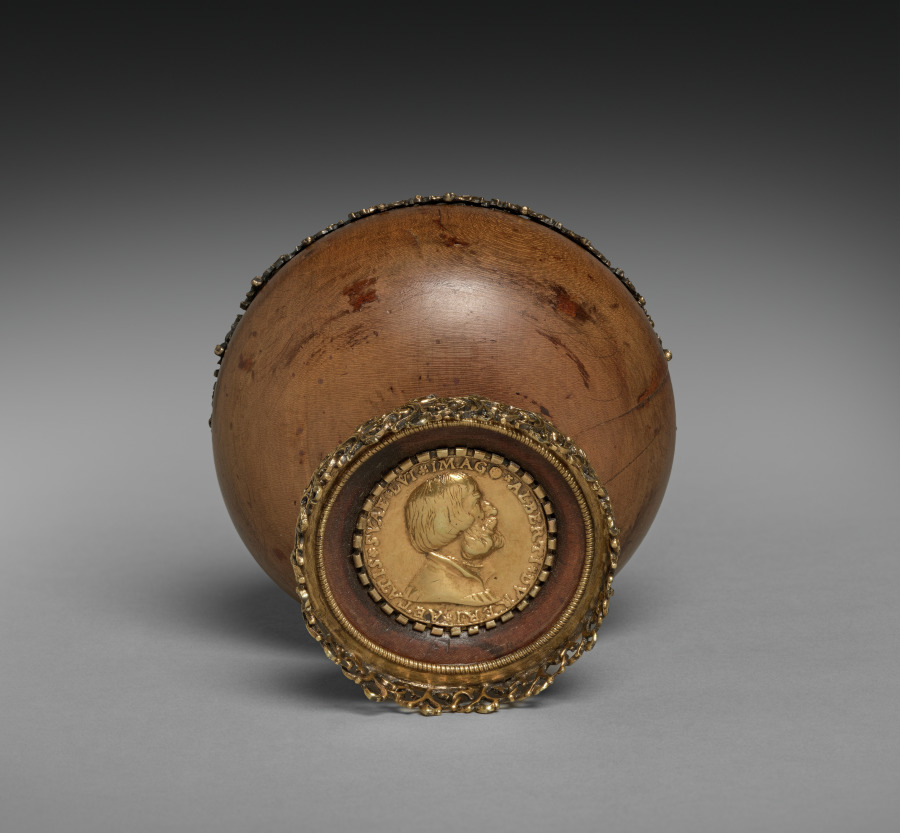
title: Double Cup (Mazer) (lid)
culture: Germany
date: c. 1530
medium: maple wood with gilt-silver mounts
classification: Wood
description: A characteristic form of drinking vessel made of close-grained wood, especially maple, was developed in Germany as early as the thirteenth century. It consisted of a larger cup with a foot and a handle and a smaller cup on top. The upper one served as a lid but could also be removed and used as a separate drinking vessel. In this example the smaller upper cup is inset with a memorial portrait medallion of Albrecht Dürer made in the year of his death, 1528. The medal is the work of Matthes Gebel who was active in Nuremberg and Augsburg as a medallist from 1523 to his death in 1574. The reverse of the medal is set into the base of the larger lower cup.